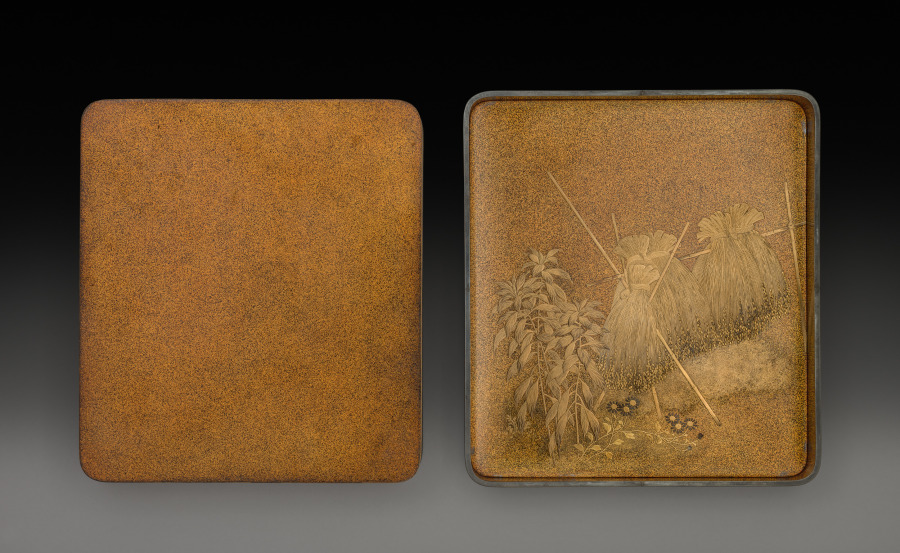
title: Writing Box (Suzuribako) with Chrysanthemum and Plum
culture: Japan, Meiji period (1868–1912)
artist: Sasaki Takayasu (Japanese, 1845–1929)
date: late 1800s-early 1900s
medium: Lacquer over wood with gold and silver sprinkled powder (maki-e)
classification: Lacquer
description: Both functional and elegant, this is a container for an ink stone, brushes, and ink from a set of writing tools that included a larger box for paper. Against a sleek gold lacquered ground, its artist has used restraint in sprinkled powder decoration (maki-e) to produce the design of cockscomb and harvested rice on the interior of the lid.